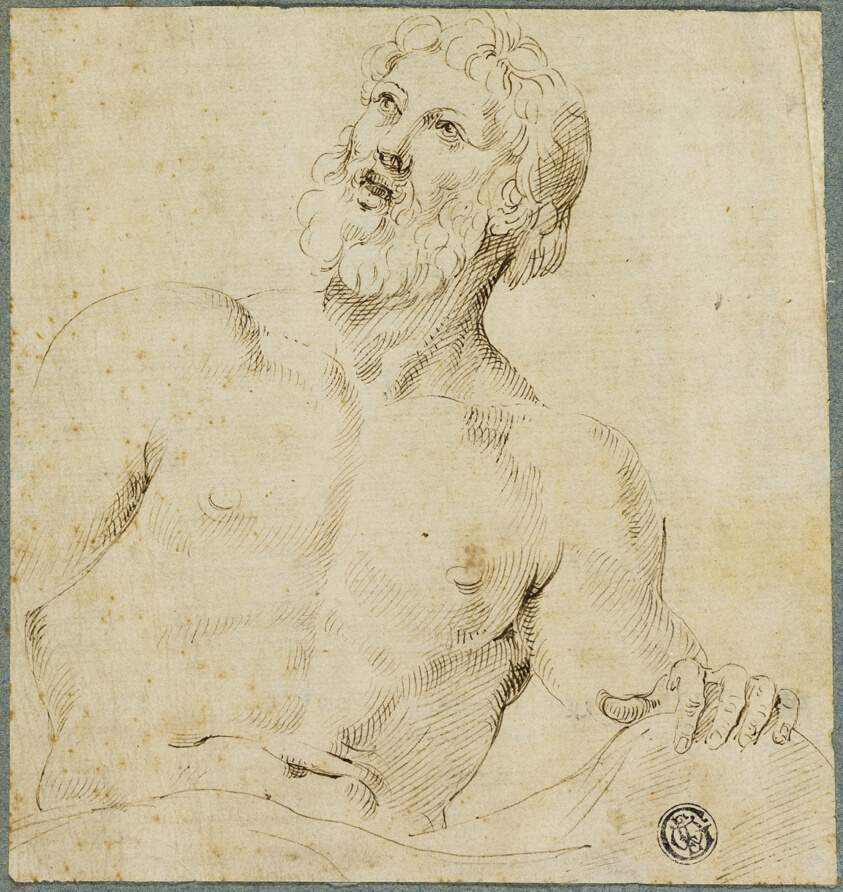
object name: Drawing and Watercolor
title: Half-length Sketch of Bearded Man (Jupiter?)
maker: After Battista Franco, called Il Semolei; Italian, c. 1510-1561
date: 1540/60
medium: Pen and brown ink on cream laid paper, tipped onto blue laid paper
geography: Italy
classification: pen and ink drawings; drawings (visual works); prints and drawing